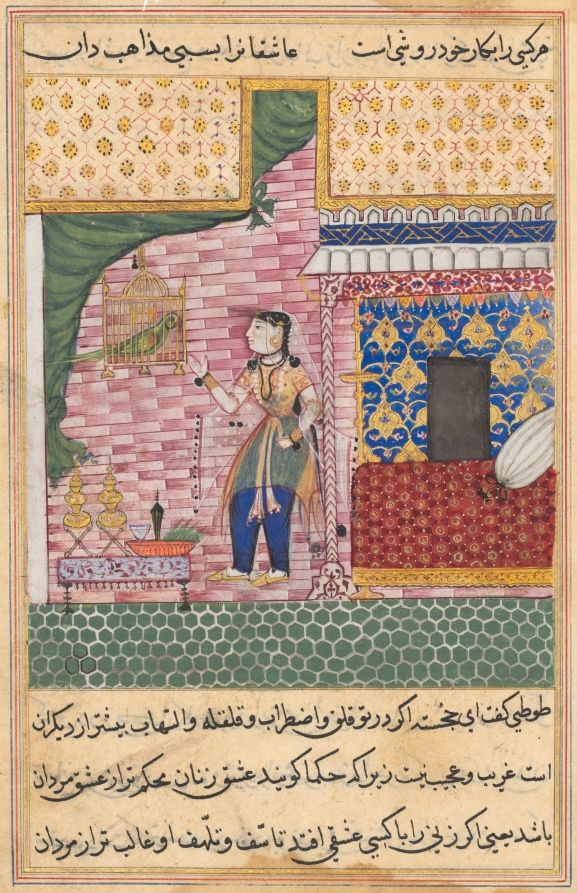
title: The Parrot Addresses Khujasta at the Beginning of the Seventeenth Night, from a Tuti-nama (Tales of a Parrot)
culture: Mughal India, court of Akbar (reigned 1556–1605)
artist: Sravana (Indian)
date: c. 1560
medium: gum tempera, ink, and gold on paper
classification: Painting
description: Tuti the talking parrot begins to tell Khujasta the story of a merchant named Mansur and his encounter with an imposter. Various features of the room, including the pale colors and flat composition are reminiscent of the pre-Akbar painting style.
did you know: The dark halo around Khujasta’s face indicates that her profile has been reshaped.